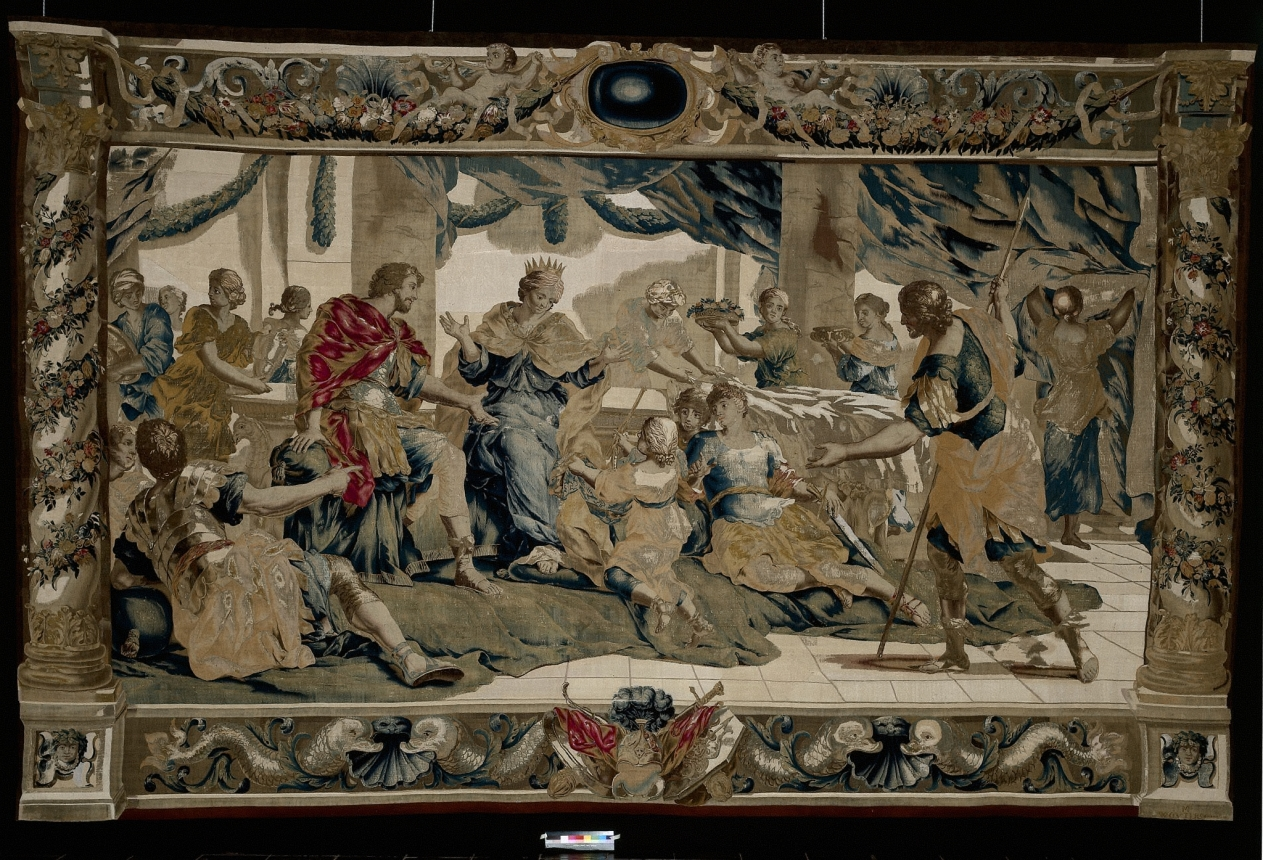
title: Cupid disguised as Aeneas's son, presents gifts to Dido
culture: Belgium, 17th century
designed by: Giovanni Francesco Romanelli (Italian, 1610–1662)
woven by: Michael Wauters (Flemish, 1679)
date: 1679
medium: tapestry weave: silk and wool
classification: Tapestry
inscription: signed lower left: M. Wovters.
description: Achates, with spear in hand, presents Cupid, who is disguised as Aeneas's son, to Queen Dido. He offers her gifts to encourage her to love Aeneas who is seated at her side. Attendants are preparing a banquet that Dido is giving in honor of Aeneas and his companions.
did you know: This tapestry is one from a series of eight that depicts the tragic love story of Dido and Aeneas. They were gifted to the museum for display in the armor court.